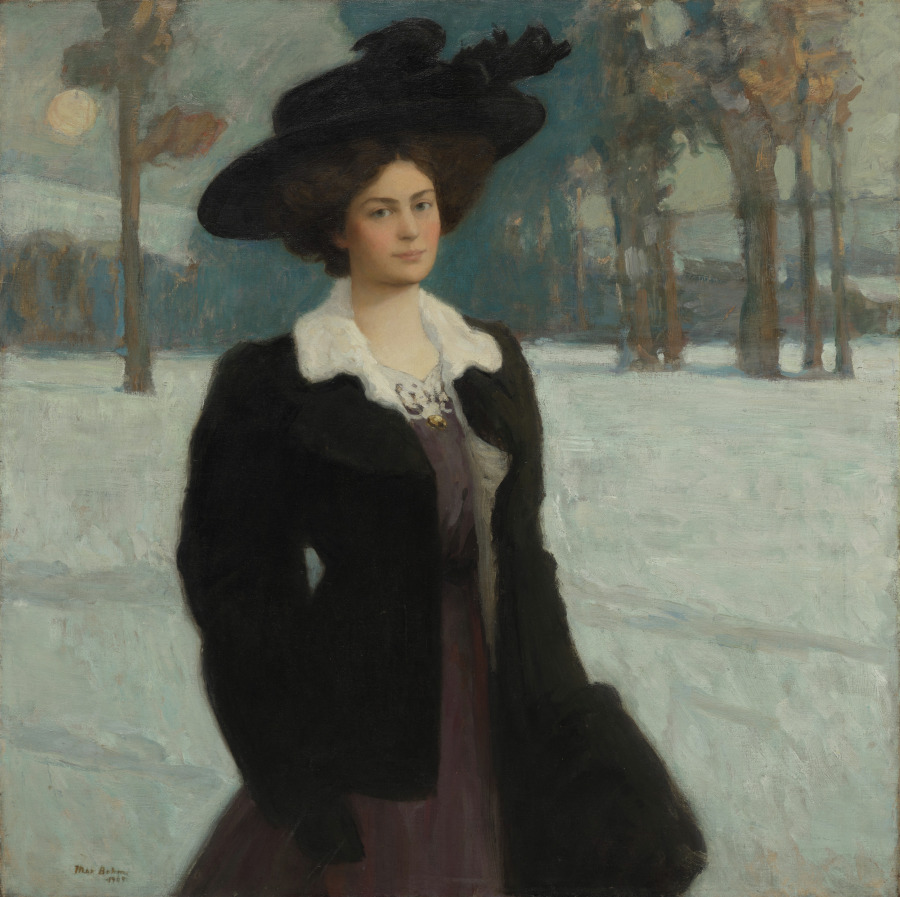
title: Lucy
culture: America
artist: Max Bohm (American, 1868–1923)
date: 1909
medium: oil on canvas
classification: Painting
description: Painted during expatriate Max Bohm’s visit to his hometown in Cleveland, Lucy depicts a former love interest, who years earlier turned down the artist’s marriage proposal because she doubted his ability to earn a steady income. During the intervening time, Bohm had wed someone else and established himself as a noted painter, earning success particularly in France and England.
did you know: Bohm created this painting while working on a commissioned mural for the Cuyahoga County Courthouse.